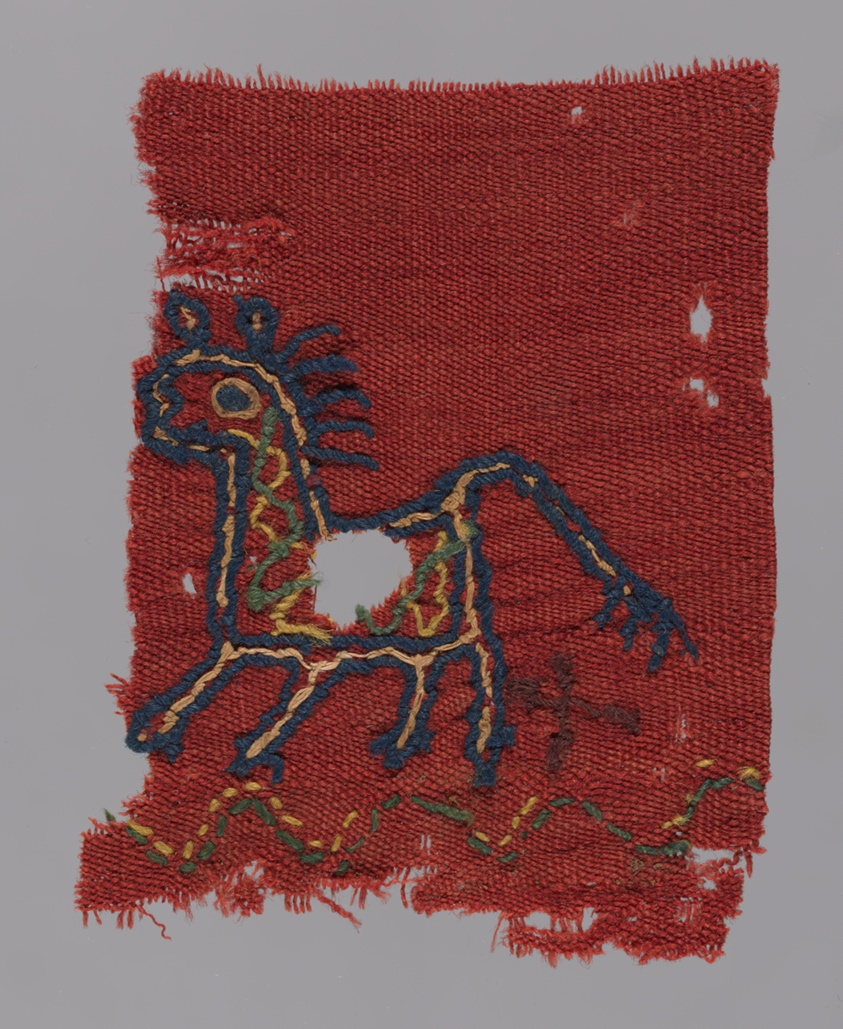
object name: Textile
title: Fragment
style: roman period (egyptian)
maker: Coptic (Egypt)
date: Roman period (30 B.C.– 641 A.D.)/Arab period (641–969), 6th/8th century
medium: Wool, tapestry weave; embroidered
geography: Egypt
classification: textile; needlework (visual works)